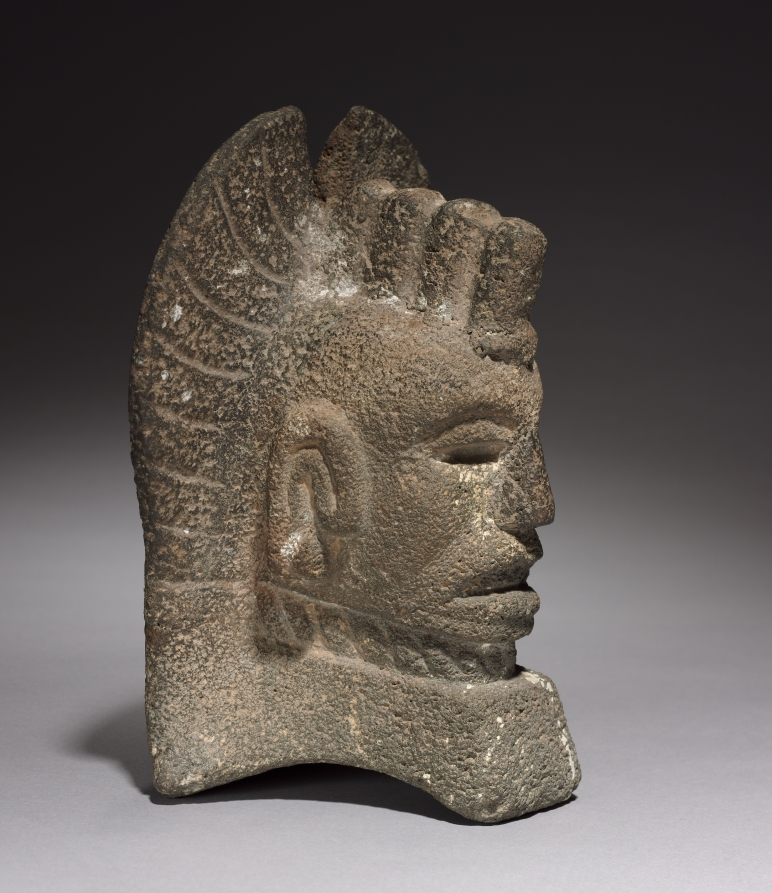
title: Head Palma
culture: Mexico, Veracruz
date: 600–1000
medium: gray volcanic stone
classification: Sculpture